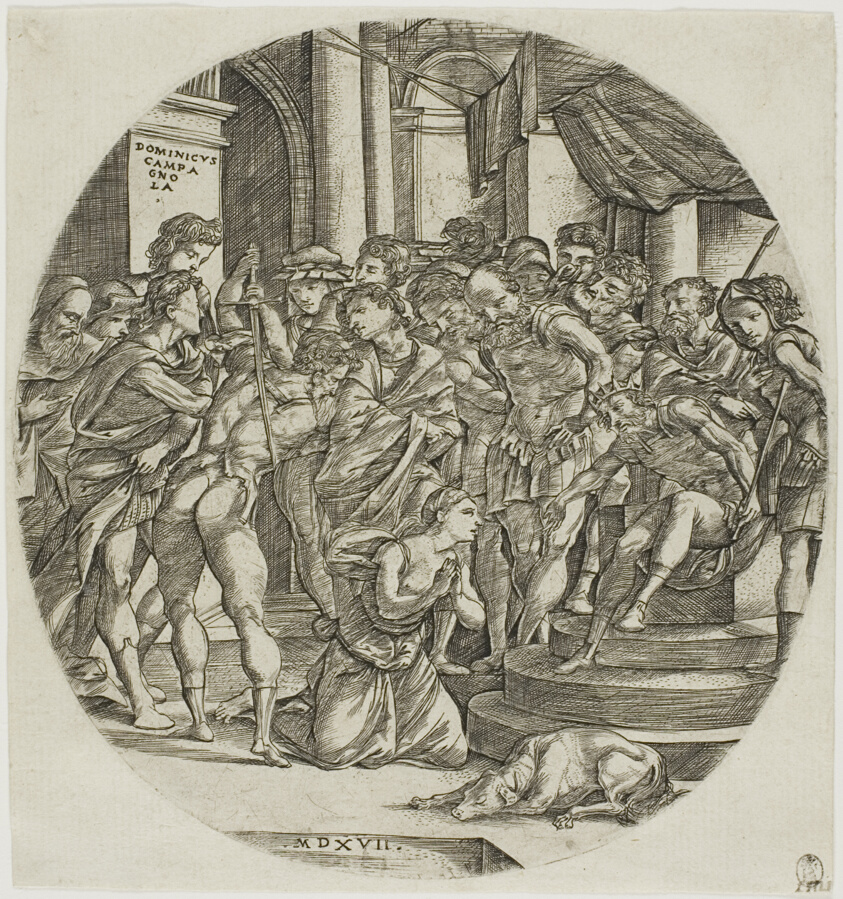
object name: Print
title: The Beheading of Saint Catherine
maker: Domenico Campagnola (Italian, c. 1500-1564)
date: 1517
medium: Engraving in black on ivory laid paper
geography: Italy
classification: engraving; print; prints and drawing